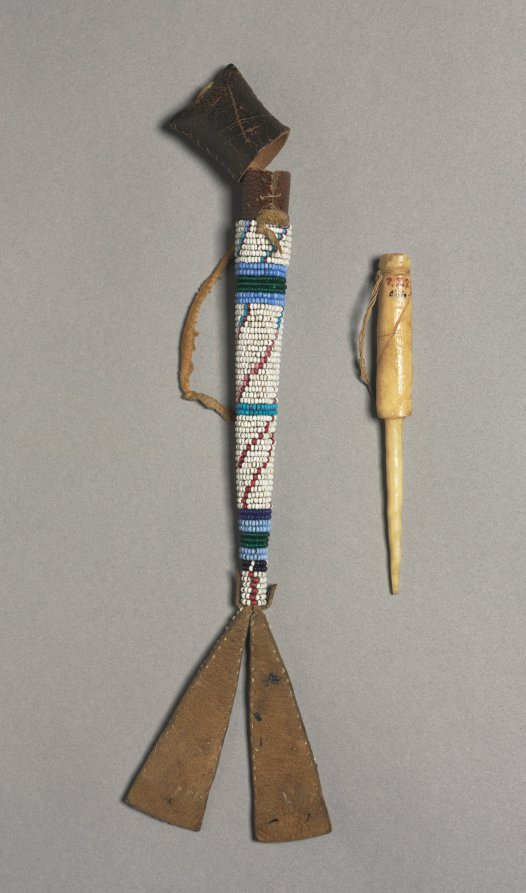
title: Bone Awl with Beaded Case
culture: America, Native North American, Gaigwu (Kiowa), late 19th century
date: late 1800s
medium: bone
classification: Implements